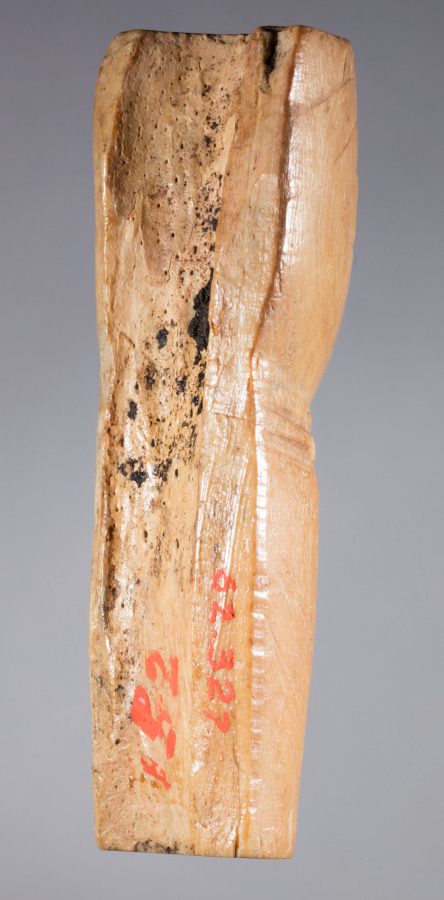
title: Figurine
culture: Iran, early Islamic period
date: 700s - 900s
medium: bone, incised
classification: Miscellaneous